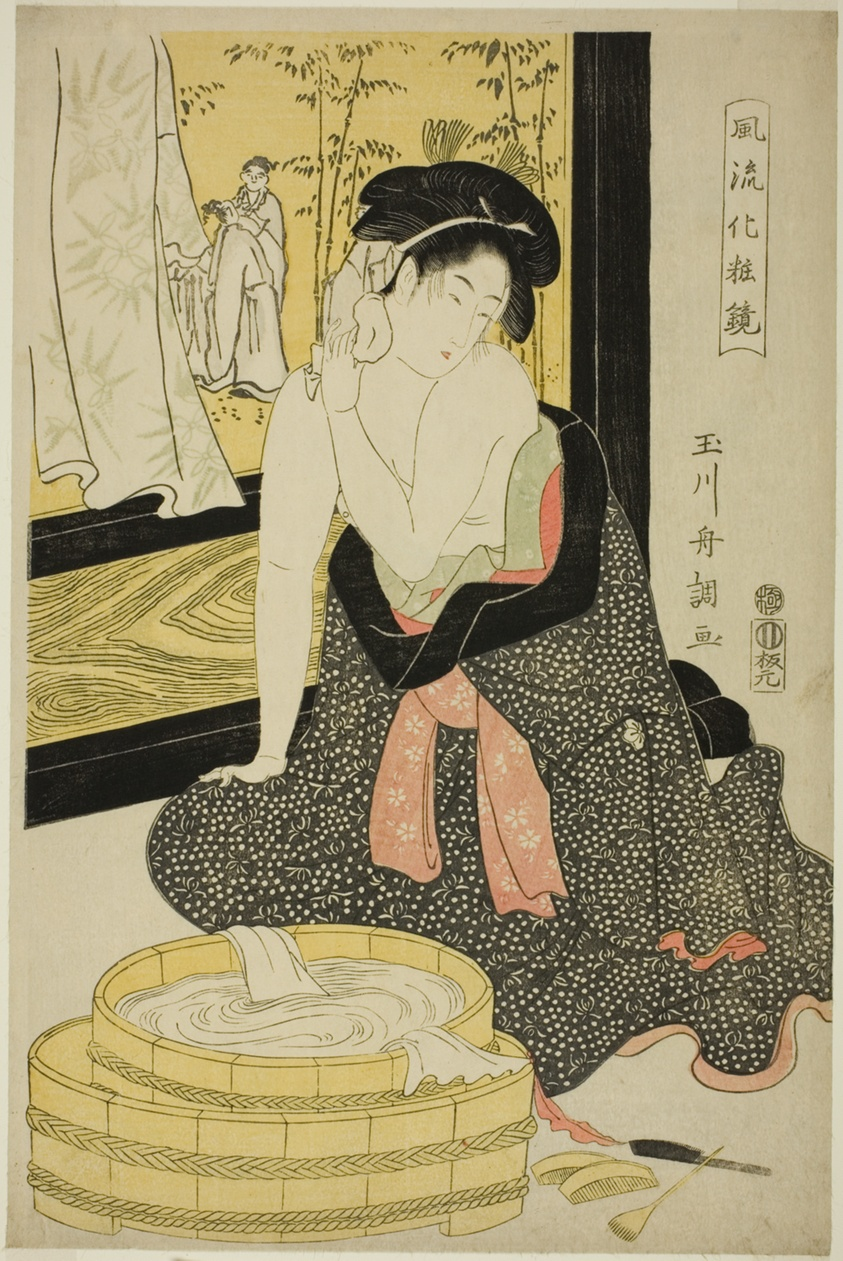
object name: Print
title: Mirror of Elegance (Furyu kesho kagami)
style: Japanese (culture or style)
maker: Tamagawa Shucho; Japanese, 18th century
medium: Color woodblock print; oban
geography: Japan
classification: woodblock print; print; asian art